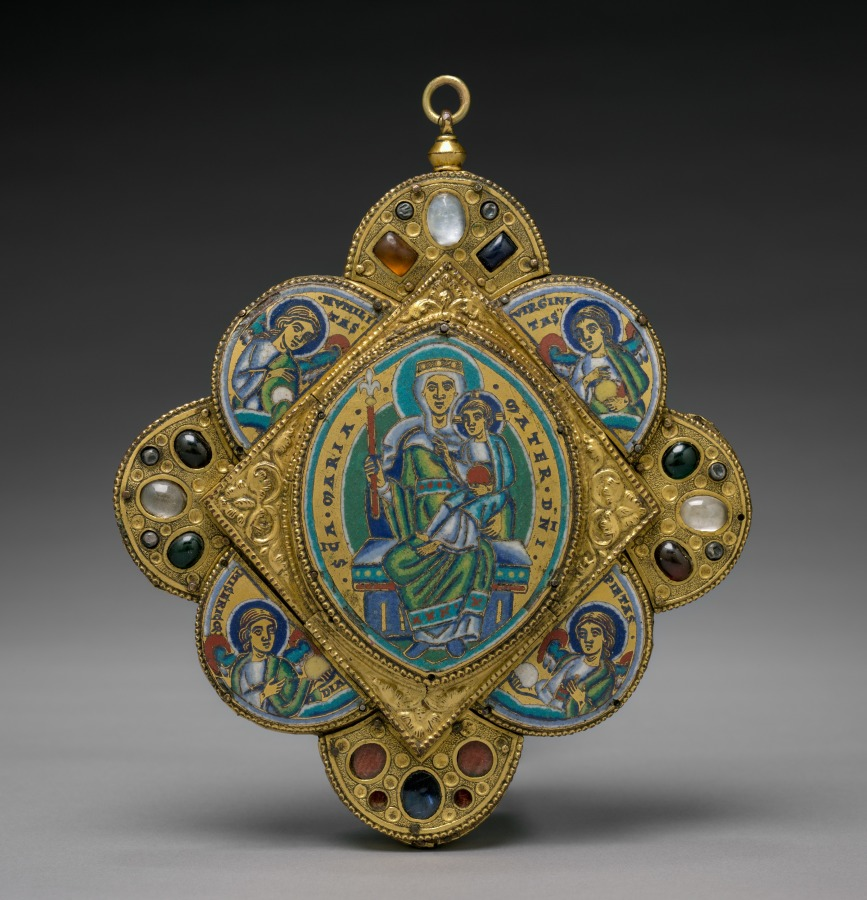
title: Pendant with the Virgin and Child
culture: Mosan, Meuse Valley, Romanesque period, 12th century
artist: circle of Godefroid de Huy (Netherlandish)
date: c. 1160–1170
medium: gilded copper, champlevé enamel; the reverse decorated in vernis brun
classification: Enamel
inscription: S[AN]C[T]A MARIA MATER D[OMI]NI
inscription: HVMILITAS; VIRGINITAS; MISERICORDIA; PIETAS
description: This pendant was made in the Rhine-Meuse region—now in modern Belgium—renowned for the production of fine metalwork objects, especially enamels. An enamel plaque depicting the enthroned Virgin and Christ child dominates the pendant. Four peripheral enamels depict angelic figures representing virtues: Humility, Virginity, Piety, and Mercy, each identified by an inscription. The pendant may have been made to serve as a reliquary to house a consecrated host. The refined craftsmanship and costly materials fittingly honor these sacred remains.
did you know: The outer lobes contain cabochons, gemstones that have been shaped and polished resulting in a rounded top and flat bottom, of garnet, glass, and quartz.